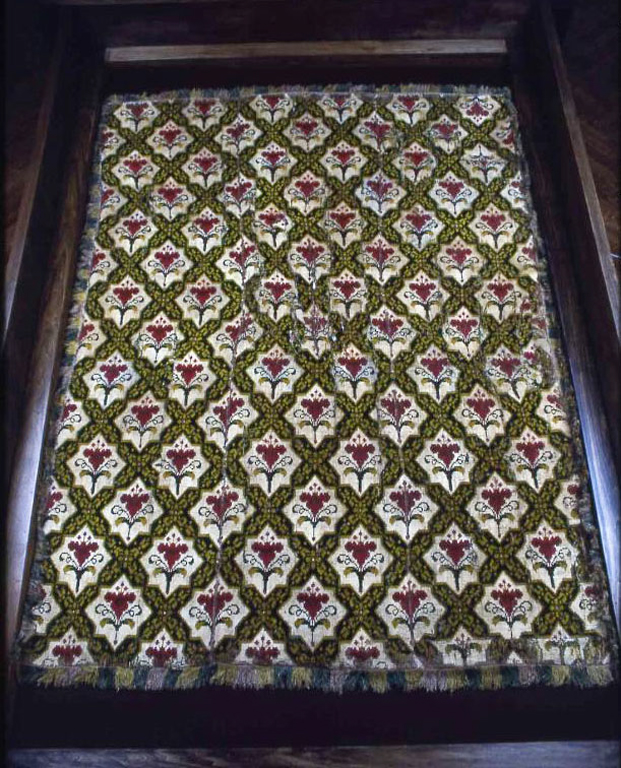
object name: Textile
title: Carpet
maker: Northern France or the Low Countries (Netherlands, Belgium, Luxembourg)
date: 1650/1700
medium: Linen and wool, plain weave with supplementary pile warps forming cut solid velvet; edged with silk and linen plain weave extended weft cut fringe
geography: Northern France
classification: textile; weaving - carpet; rug